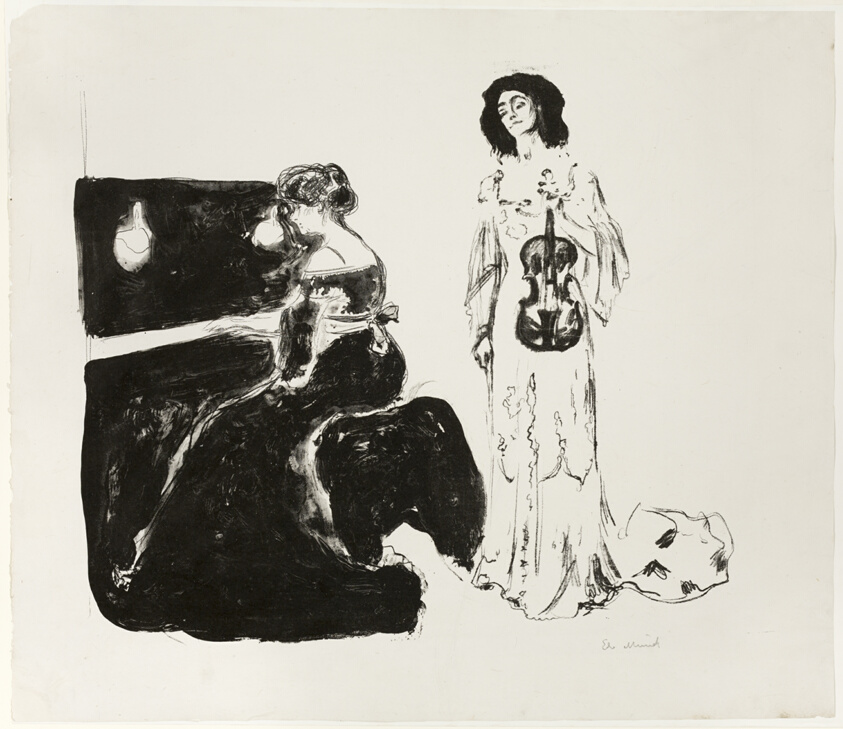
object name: Print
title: The Violin Concert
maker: Edvard Munch (Norwegian, 1863-1944)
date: 1903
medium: Lithograph on paper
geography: Norway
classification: lithograph; print; prints and drawing